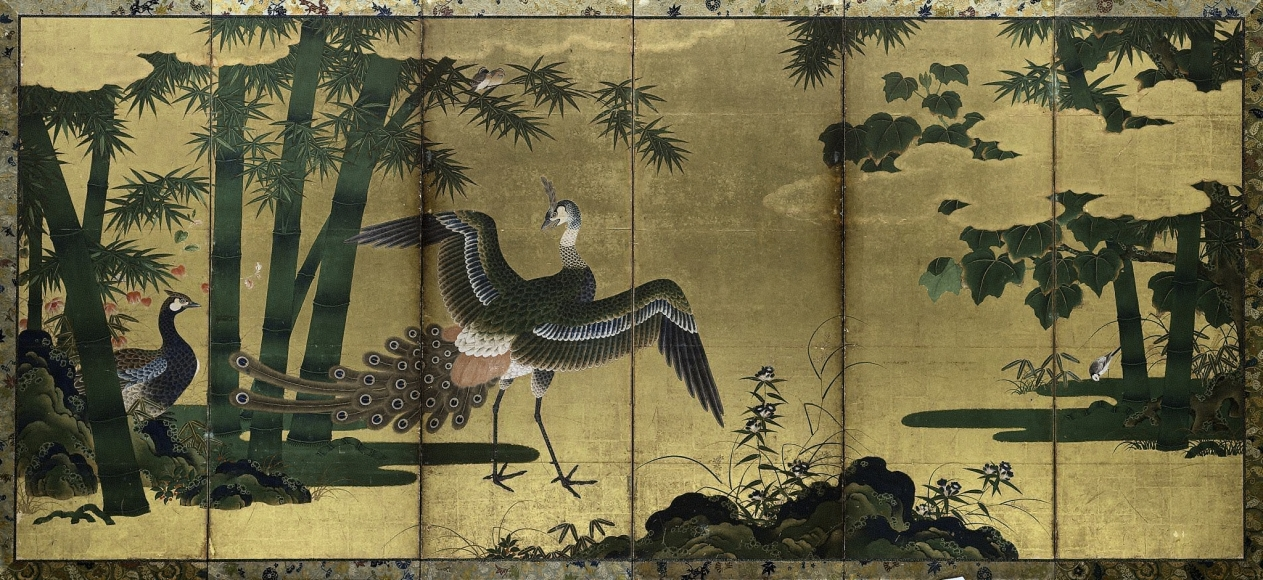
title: Peacocks and Bamboo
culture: Japan, Momoyama period (1573–1615)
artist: attributed to Tosa Mitsuyoshi (Japanese, 1539–1613)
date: late 1500s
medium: One of a pair of six-panel screens; ink, color, and gold on gilded paper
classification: Painting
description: The immense heraldic birds on display in these byøbu reflect the Momoyama era's spirit of newly gained self-confidence and an affinity for grand expressive statements in painting, architecture, the textile and ceramic arts, as well as garden design. While that period preceded the arrival of prosperity, it clearly marked an extra---ordinary moment in Japanese cultural history, one frequently compared with the twelfth century of the Heian period. Through the extensive use of gold-foil backgrounds rather than the somber palette of carefully orchestrated ink tones evident in Muromachi byøbu, patrons colla-borated with artists as well as craftsmen in fostering a decidedly new look in much of Japanese painting. Here for instance there is no imaginary vista suggesting China's vast waterways and mountain ranges. The setting is composed instead of highly stylized lozenges of mineral green paint, suggesting the earth from which clumps of grass, flowering plants, and towering bamboo and paulownia trees emerge. Clusters of lumpy, blue-green rocks dotted with lichen provide stabilizing three-dimensional foils for these islands of vegetation as well as the all-encompassing flat, golden surface. The glorious artificiality of the setting precisely serves the artist's effort to compose a credible yet other-worldly vista for depicting the legendary phoenix gazing across the landscape at the pair of peacocks. Rather than an emblem of immortality, as it is in Western lore, in Japan the phoenix evolved out of its origins in Chinese mythology to become, by the sixteenth century, an auspicious symbol of political authority. Together with clusters of the distinctively shaped paulownia leaves, this long-tailed, mythical bird graced lacquerware as well as mural paintings, proclaiming an air of graceful com-mand. A characteristic infusion of temporality has been included also, through a seasonal flowering schema extending from spring to early summer (right) to fall and the advent of winter (left). Although traditionally attributed to the Tosa school master Tosa Mitsuyoshi (1539-1613), these byøbu possess neither seals nor signatures to confirm that authorship. Known for his jewel-like, modest-sized album paintings of courtly narratives such as The Tale of Genji, it is likely both studio training and contemporary fashions in patronage conspired to produce a good number of such byøbu. This example from the Momoyama era represents one such effort from a masterful Tosa painter, too little seen in Western collections.